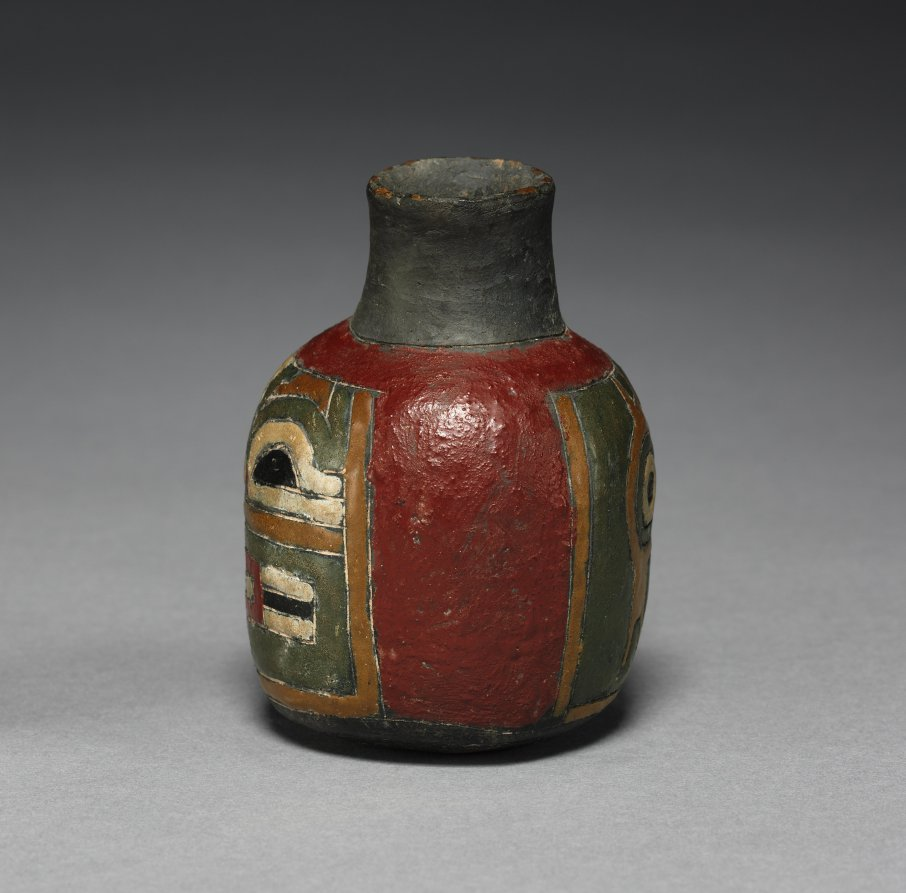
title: Small Bottle with Feline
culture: Peru, South Coast, Paracas (Cavernas) style (700 BCE–1 CE)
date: 700–1 BCE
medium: earthenware, resin-based paint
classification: Ceramic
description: Little is known of the meaning of the beautifully abstracted felines so often incised on Paracas ceramics. The designs achieve much of their complexity through color applied as resin-based paint after the vessel was fired in a smoky atmosphere that blackened its surface.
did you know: Small, wild, reclusive felines, pampas cats live on the margins of agricultural fields, where they prey on rodents and other pests that are a farmer’s bane.